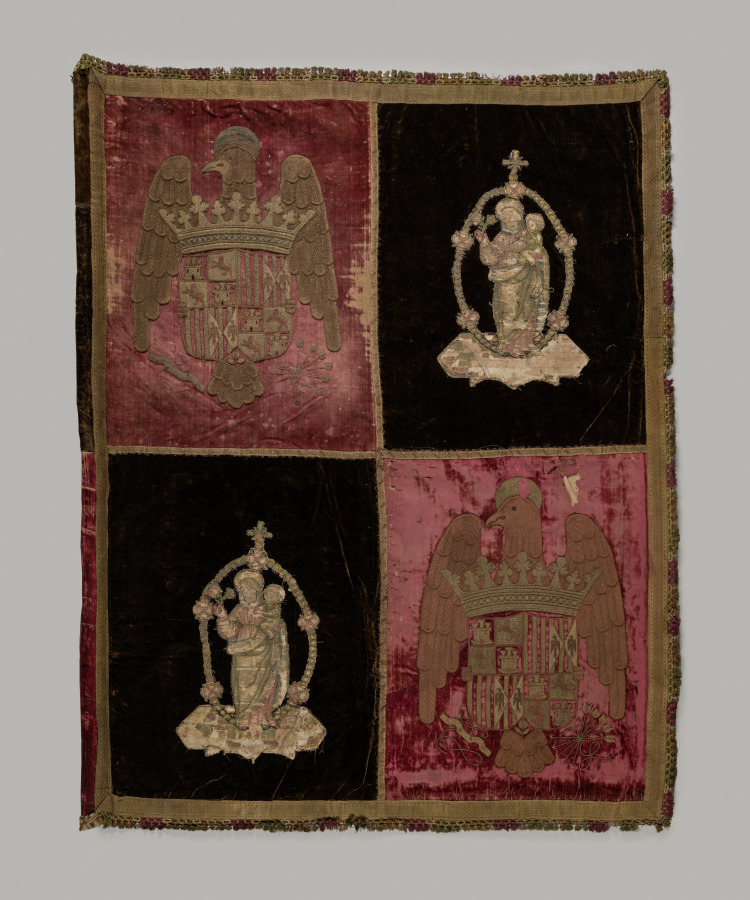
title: Banner with a Quartered Royal Arms of Spain and the Madonna and Child (banner)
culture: Spain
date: 1500s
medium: red and dark brown velvet, embroidered; fringe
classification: Velvet